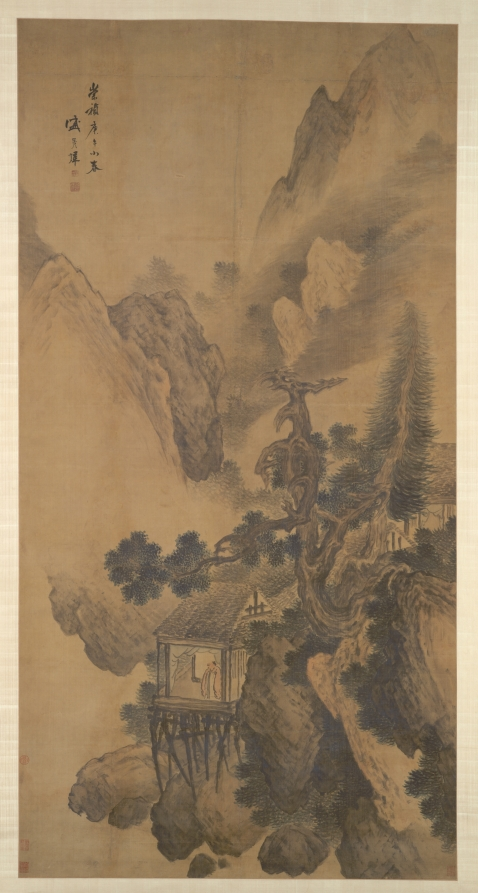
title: Lonely Retreat Overlooking a Misty Valley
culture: China, Ming dynasty (1368–1644)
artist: Sheng Maoye (Chinese, active early 1600s)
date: 1630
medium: hanging scroll; ink and slight color on silk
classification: Painting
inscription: Artist's inscription, signature, and 2 seals: In the tenth month of the gengwu year of the Chongzhen era [1630]. Sheng Maoye [seals] Sheng yin Maoye; Yuhua shi.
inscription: 4 additional seals of Liu Shu (1759–1816)